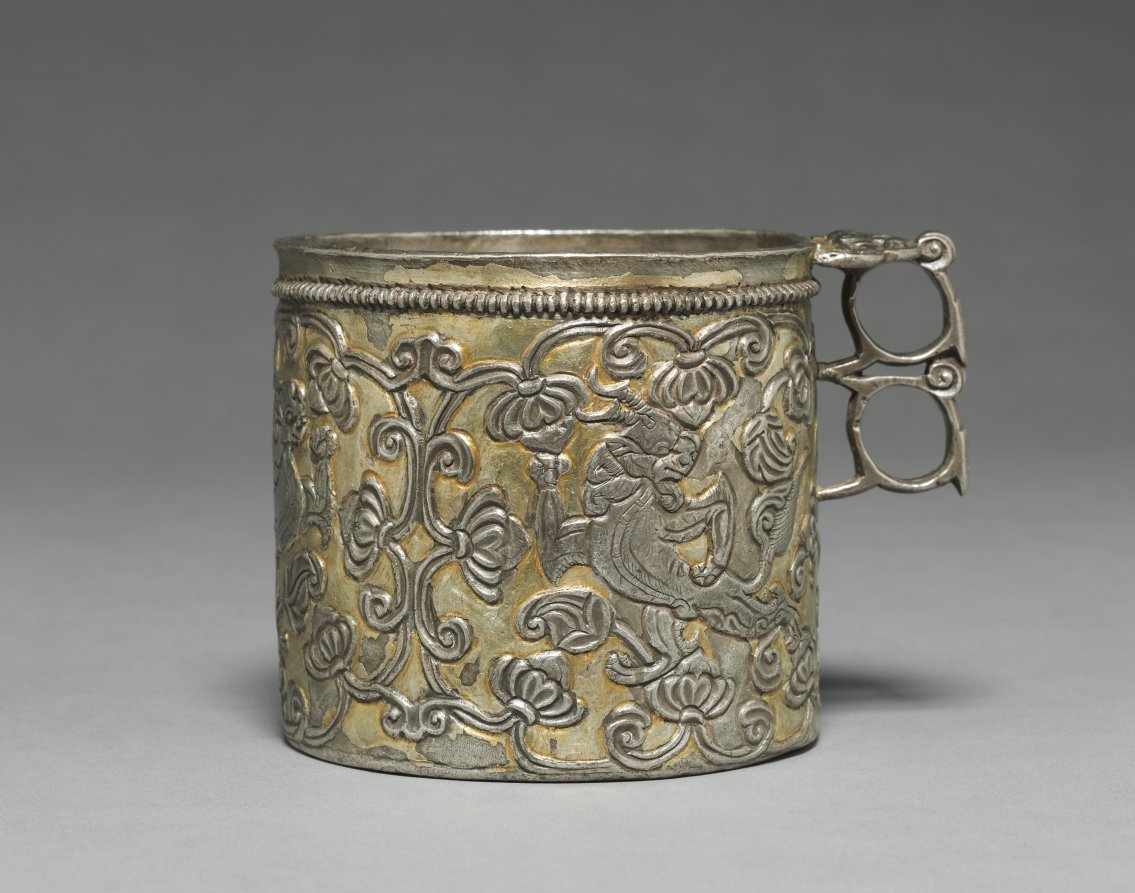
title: Beaker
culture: Central Asia (Sogdiana) or Tibet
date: c. late 600s–early 700s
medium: silver with gilding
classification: Silver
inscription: Inscribed on bottom of the cup: "Phan shing gong skyes gui sug byad (or byang)"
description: The circular shapes of the cup’s handle feature a flat edge on which the user rested their thumb for better grip, a design characteristic of silver objects made during the 700s by Sogdian artists, who traveled from Central Asia along international trade routes. An ownership inscription in Tibetan script on the underside of the cup identifies the vessel as a personal possession. The circles and lines carved below this inscription are likely measurements recording the weight of the silver used for the cup.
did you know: This cup depicts two lions and a lionlike animal with horns!